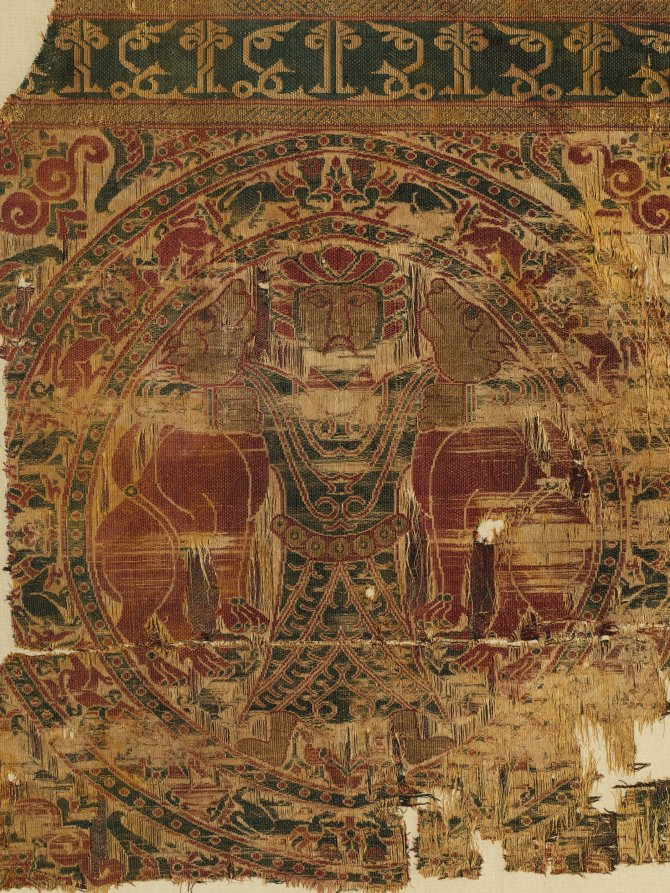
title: Fragment with Lion Strangler from a Dalmatic of Saint Bernard Calvo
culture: Spain, Almeria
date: 1200–1243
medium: Silk and gold thread: lampas, taqueté, and plain-weave variant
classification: Textile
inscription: the inscription (incorrectly written) appears to read "al-'amir" (command, i.e. authority) [alternately retrograde and vice versa].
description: Within the elaborate roundel, a bearded man with a belted tunic strangles a lion in each hand. Gold thread shimmers on their heads and his hands. In the inscription band across the top, an Arabic word has been written with mirror-image symmetry. It can be read as al-yumn, primarily translated as prosperity. The central motif of this renowned silk is a pre- Islamic Persian symbol of royal power. Both Muslims and Christians throughout the Iberian Peninsula admired such textiles. Members of the Catholic clergy incorporated it into a dalmatic—a long ceremonial tunic. It was found in the late 1800s in the tomb of Saint Bernard Calvo, Bishop of Vich (1180–1243).